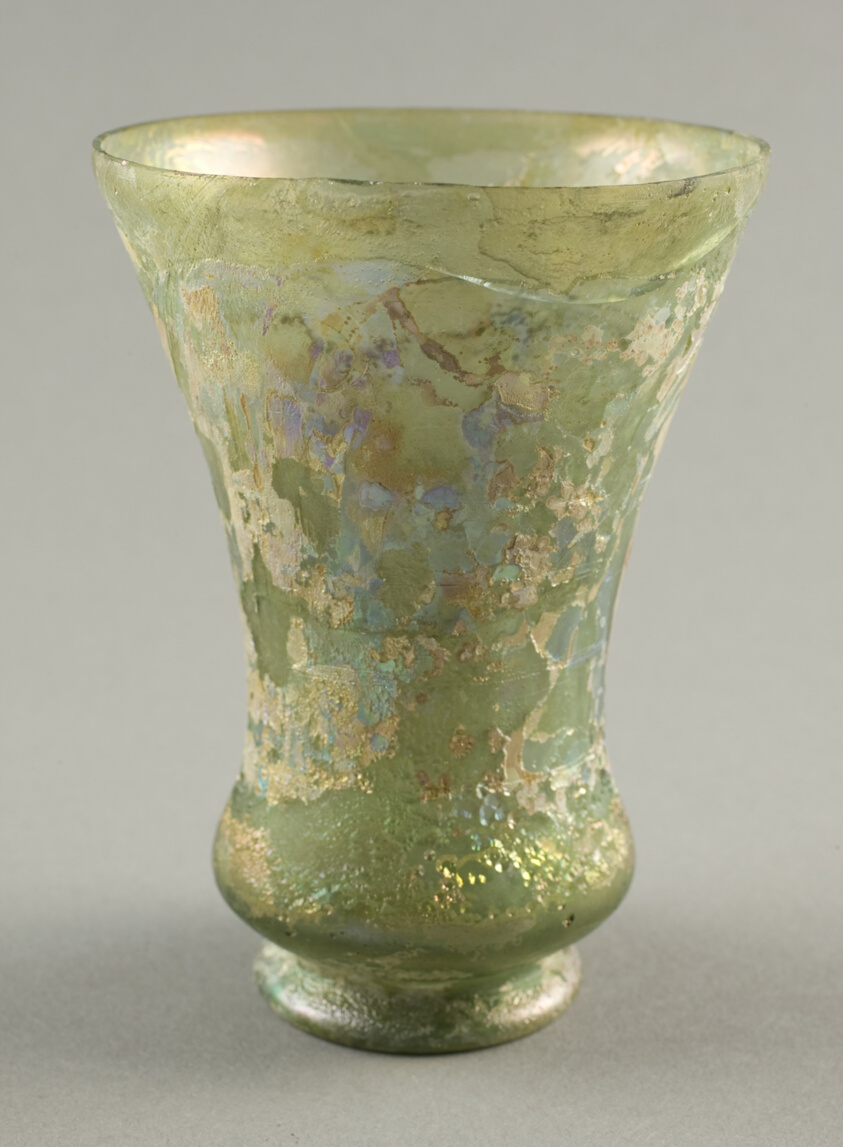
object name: Vessel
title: Beaker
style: syrian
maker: Roman, Levant or Syria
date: 1st century or later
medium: Glass, blown technique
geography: Syria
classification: drinking vessel; glass; vessel; ancient art